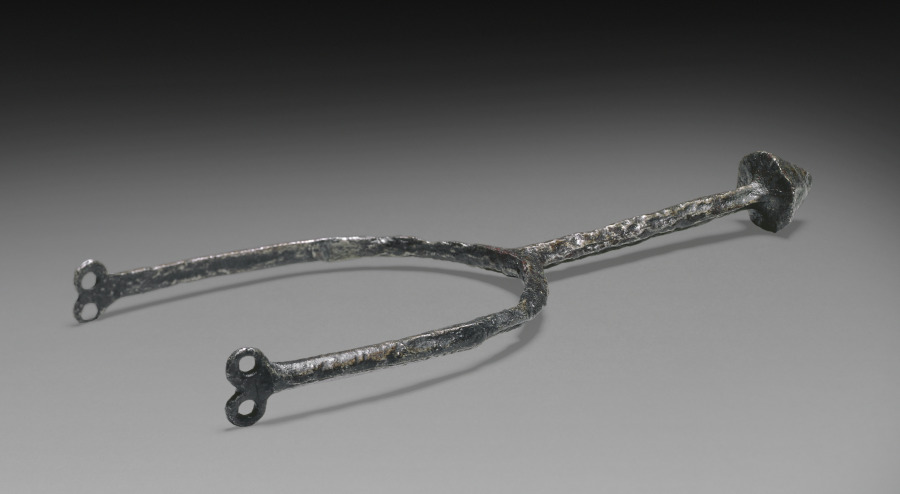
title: Pricked Spur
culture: Spain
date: 1200s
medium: steel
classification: Arms and Armor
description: The spur was an essential part of the knight's equipment. Fastened to his heels by means of straps and buckles, it was used to prod a horse into action. This example represents the oldest type recorded, the "pricked" spur, so-called because its neck terminated in a spike. The pricked spur was replaced during the Middle Ages by the "rowel" spur, with a rotating spiked wheel.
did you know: Before they were made of metal, the earliest spurs were probably thorns that were attached to the back of the heel.